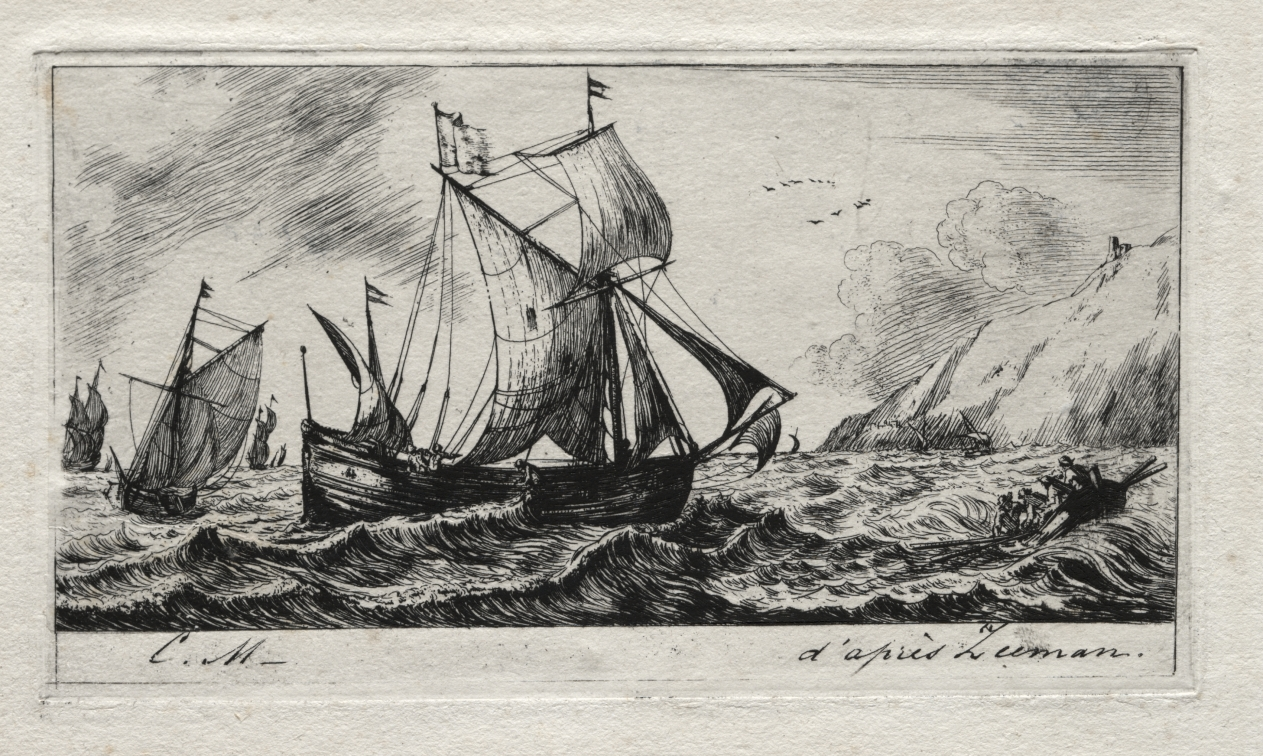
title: The Galliot of Jean de Vyl of Rotterdam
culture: France, 19th century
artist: Charles Meryon (French, 1821–1868)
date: 1850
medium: etching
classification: Print